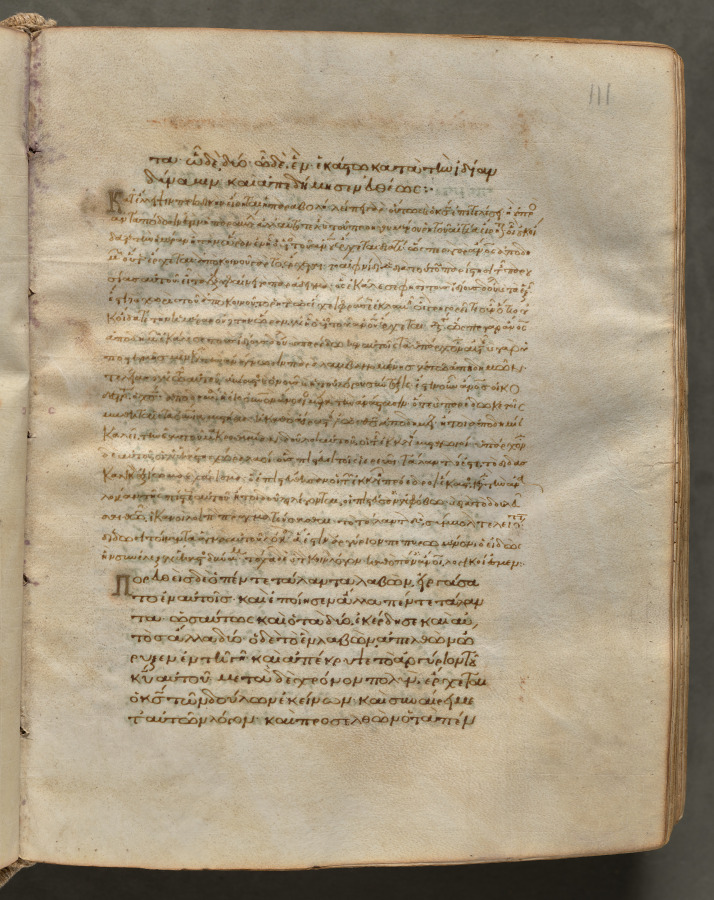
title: Text, folio 111 (recto), from a Gospel Book with Commentaries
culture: Byzantium, Constantinople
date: c. 1000–1100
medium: ink, tempera, and gold on vellum; leather binding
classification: Bound Volume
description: Each of the four gospels in this book opens on a page with brilliantly illuminated borders depicting the author of the text as well as birds-principally peacocks, symbols of the immortality of the soul-and fountains, representing the fountain of life and the salvation of the soul. This volume consists of 428 leaves with texts in Greek. Its level of sophistication suggests that it was probably written and decorated in a monastery in Constantinople.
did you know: Gospel Books were carried in procession through Byzantine churches.